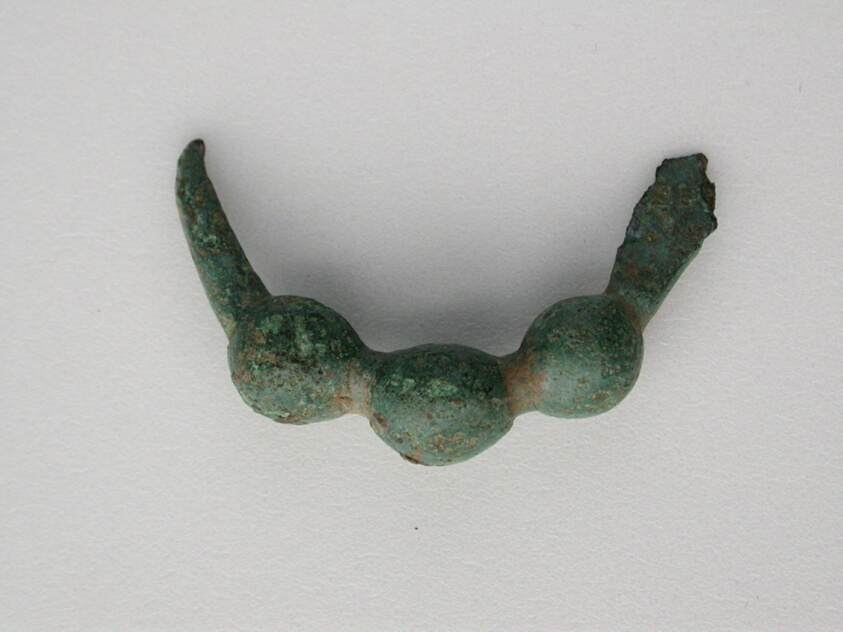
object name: Costume and Accessories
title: Bow Fibula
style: geometric, ancient, greek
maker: Greek; Thessaly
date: Geometric Period (800–700 BCE)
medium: Bronze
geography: Greece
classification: votive offering; jewelry; ex-voto; fibula; costume